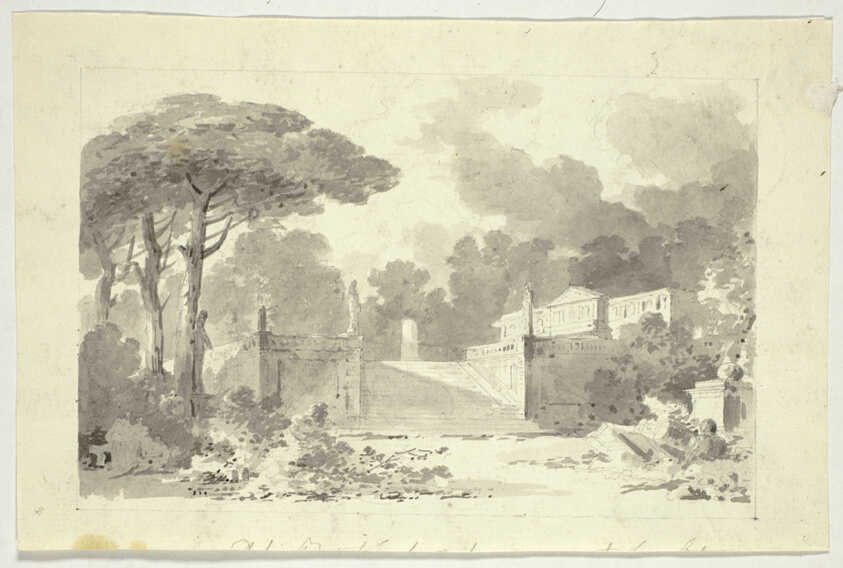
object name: Drawing and Watercolor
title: View of the Park at Versailles: Monumental Staircase, Pedestal and Temple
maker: Pierre Antoine Mongin (French, 1761/62-1824/27)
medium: Brush and gray wash, with graphite, on cream laid paper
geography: France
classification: ink or chalk wash; drawings (visual works); prints and drawing